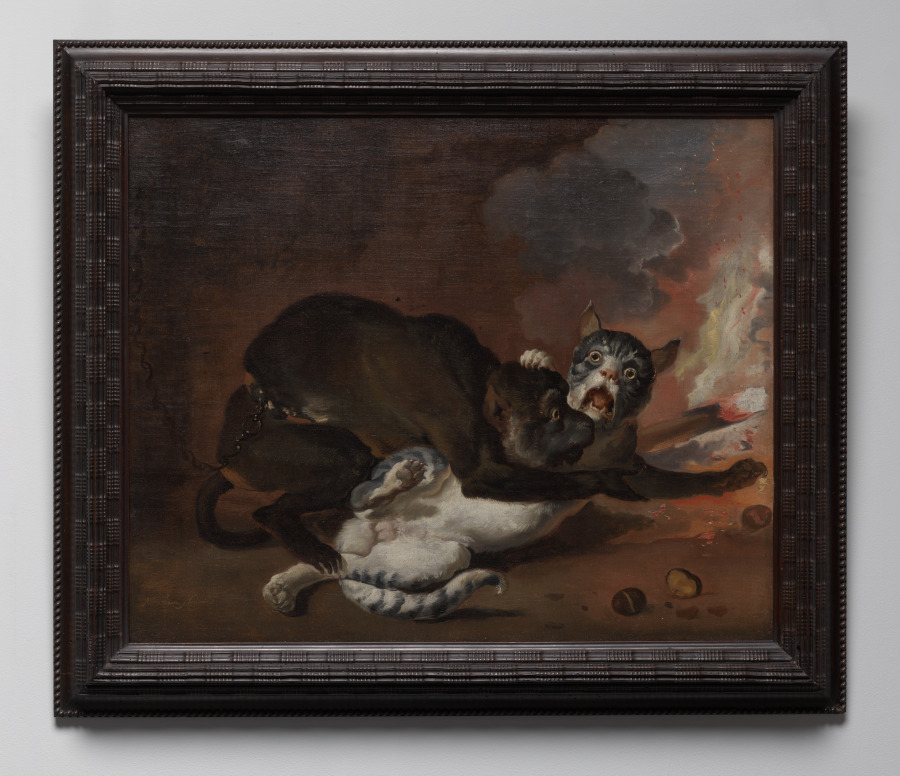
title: The Monkey and the Cat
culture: Netherlands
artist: Abraham Hondius (Dutch, c. 1625–1695)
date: probably 1670s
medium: oil on canvas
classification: Painting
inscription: Signed lower left: "Abraham Hondius"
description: This picture interprets one of Aesop’s ancient Greek fables (or probably the more contemporary interpretation by Jean de la Fontaine, even more famous at the time), which warns of the dangers of flattery. A monkey sweet-talks a cat into pulling scalding chestnuts out of the fire. The cat finishes the risky and painful task to discover that the monkey has already gobbled up nearly all of them.